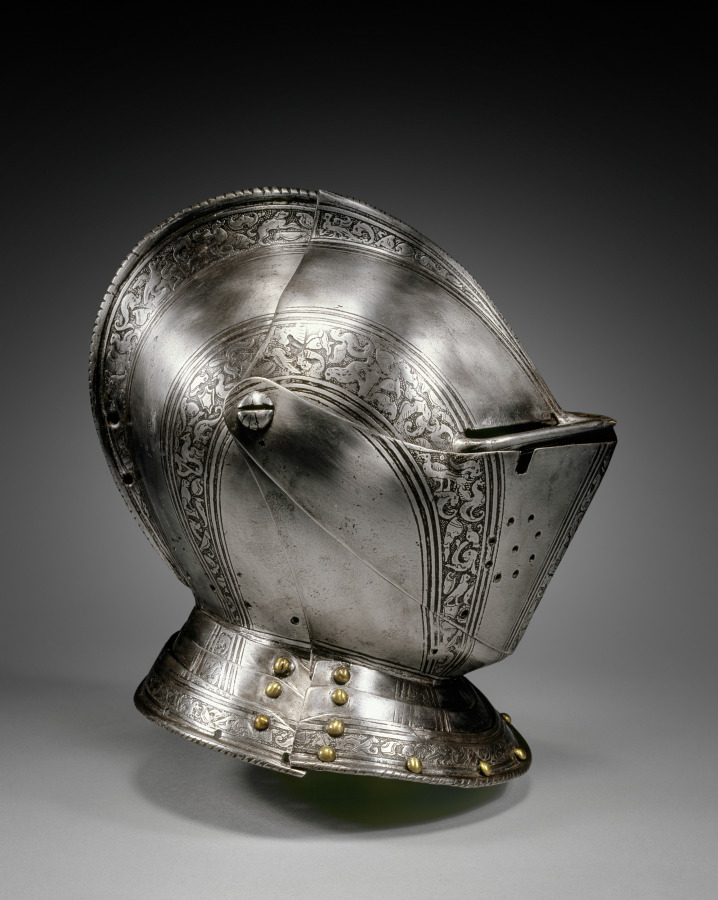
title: Close Helmet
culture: North Italy, Brescia (?), 16th century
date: c. 1575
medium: steel with etched decorative bands and roundels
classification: Arms and Armor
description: Decoration was critical to fine armor, and etching was the most commonly used technique. Here, the bands along the borders are etched. On the breastplate, pauldrons (shoulder guards), and tassets (hip and upper leg guards), etched medallions enclose profile busts reminiscent of ancient Roman portraits. The lance rest on the breastplate indicates that this half-suit was once part of a complete field armor for man and horse. The etching technique used for armor was developed in the late 1400s. The metal surface was first coated with an acid-resistant substance, such as wax or varnish. An etching needle was then used to scratch a design into the surface. The exposed areas were then treated with an acid that would "bite" or etch the lines into the metal. When the coating was removed, the etched design was blackened for contrast.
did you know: Etching, by far the most common technique for armor decoration, involved the use of a graving tool assisted by acid to create a design. The etched design could then be blackened to create contrast as shown here.